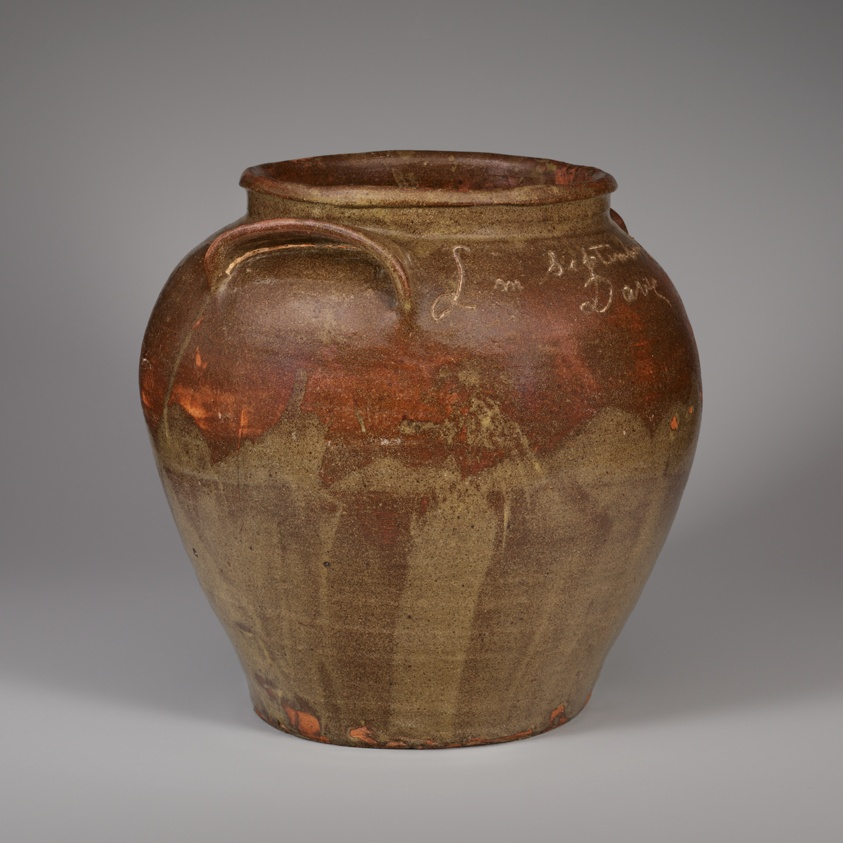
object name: Ceramics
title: Storage Jar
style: 19th century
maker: David Drake (American, c. 1801–1870s); Lewis Miles Stoney Bluff Manufactory [plantation] (American, c. 1840–70s); Edgefield, South Carolina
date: 1857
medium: Stoneware and glaze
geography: Edgefield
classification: container; american decorative arts; pottery; ceramics; stoneware; vessel; decorative arts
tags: storage